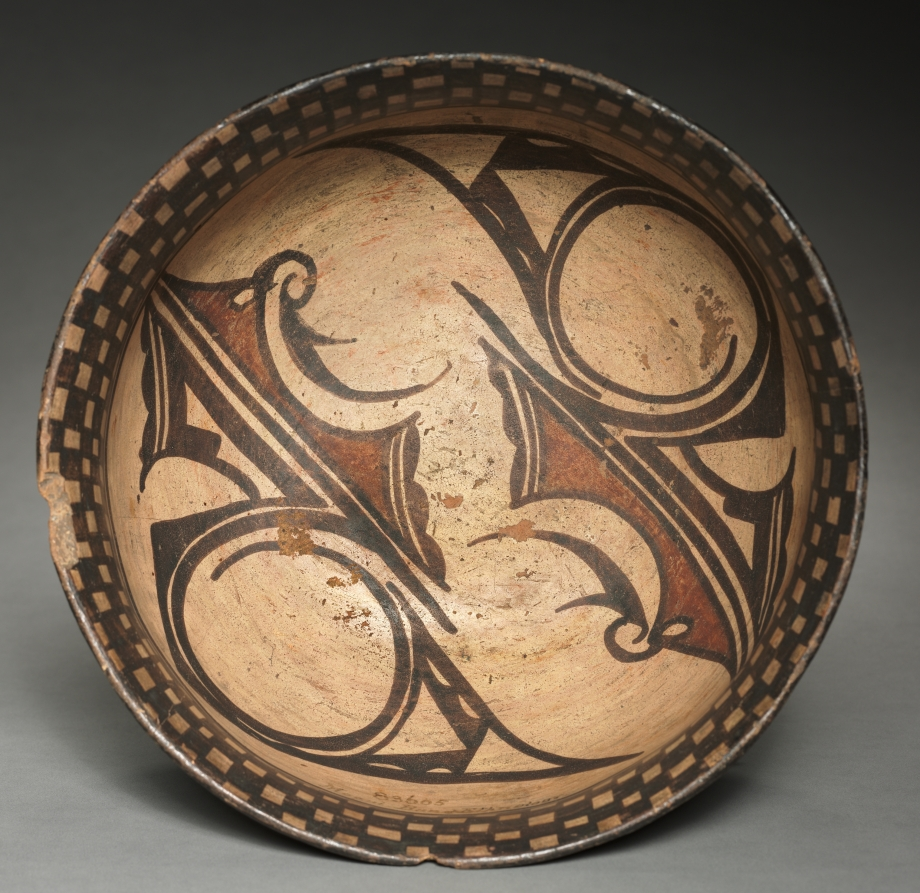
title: Stew Bowl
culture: Southwest,Pueblo, Hopi, Post-Contact Period, 20th century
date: 1870– 1880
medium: ceramic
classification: Ceramic